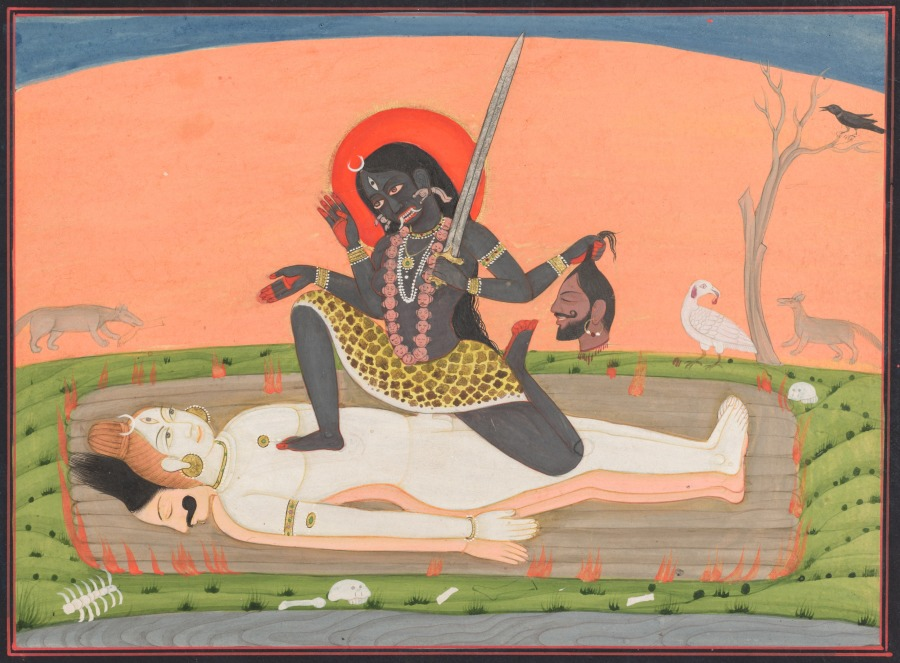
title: Kali on Shiva, from a Tantric Devi Series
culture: Northern India, Pahari kingdoms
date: c. 1810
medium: gum tempera and gold on paper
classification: Painting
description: The goddess Kali kneels in the posture reserved for wrathful deities ready for battle. In one hand she holds the sword she used to sever the demon head she triumphantly grasps in another hand. As the personification of divine energy—shakti in Sanskrit—Kali appears active, while the male principle, personified as her consort Shiva, is like a corpse (shava). The scene is set in a cremation ground, complete with vultures, jackals, and bones. Contemplation of paintings such as this assists followers in overcoming fear of death. In this image, the dead body is overlaid with the dual principles of the divine in Hindu thought: male and female, passive and active, matter and energy, white and black, Shiva and Shakti.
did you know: This Tantric Devi painting is from a series made in the Pahari Kingdom of Mandi. CMA also has another from the same series, 2020.431.